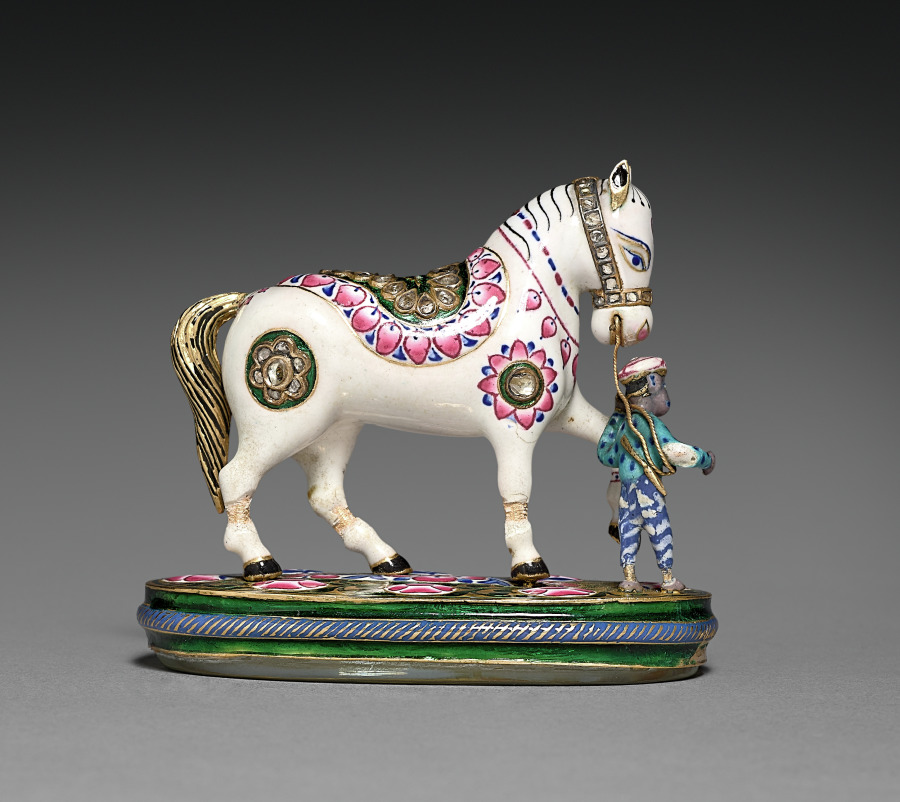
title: Ladies Hand Mirror with Horse as Handle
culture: India, Jaipur, late 18th-19th Century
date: late 1700s-1800s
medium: enamel inlaid with semi-precious stones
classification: Enamel